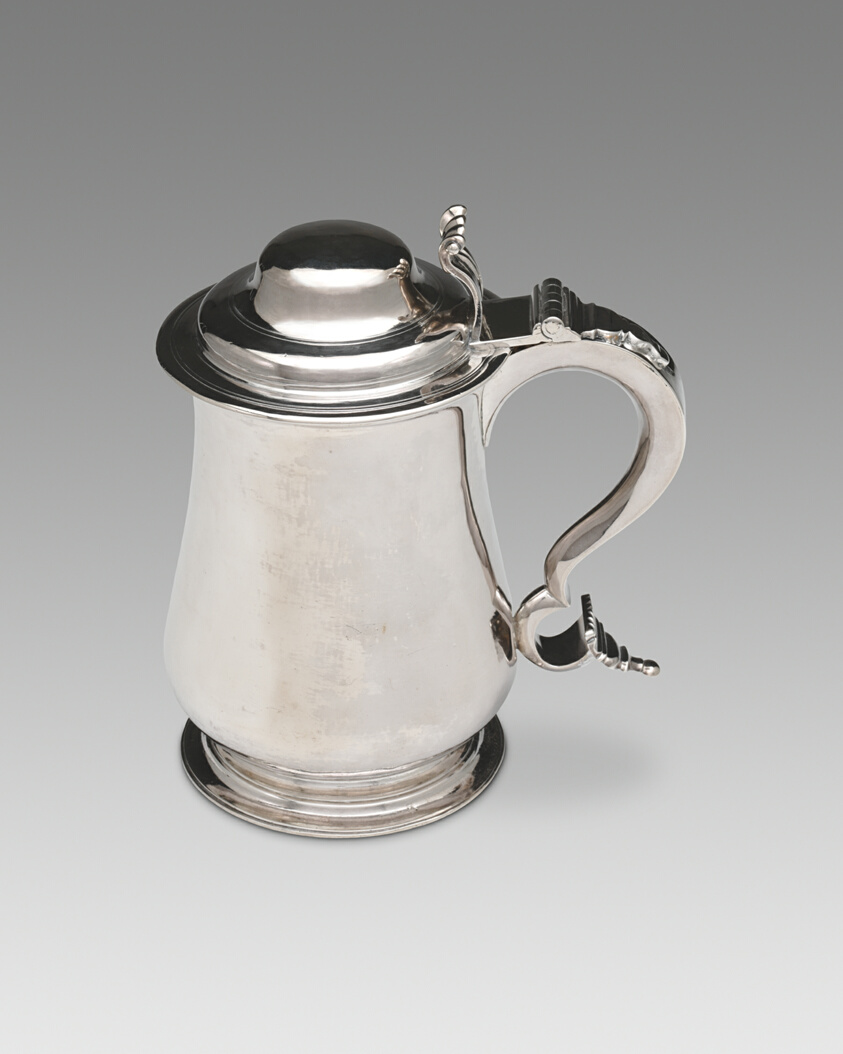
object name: Metalwork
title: Tankard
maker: William Hollingshead; American, 1728–1808; Philadelphia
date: 1754–75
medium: Silver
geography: Philadelphia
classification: drinking vessel; silver; american decorative arts; american arts; decorative arts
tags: dining, drinking